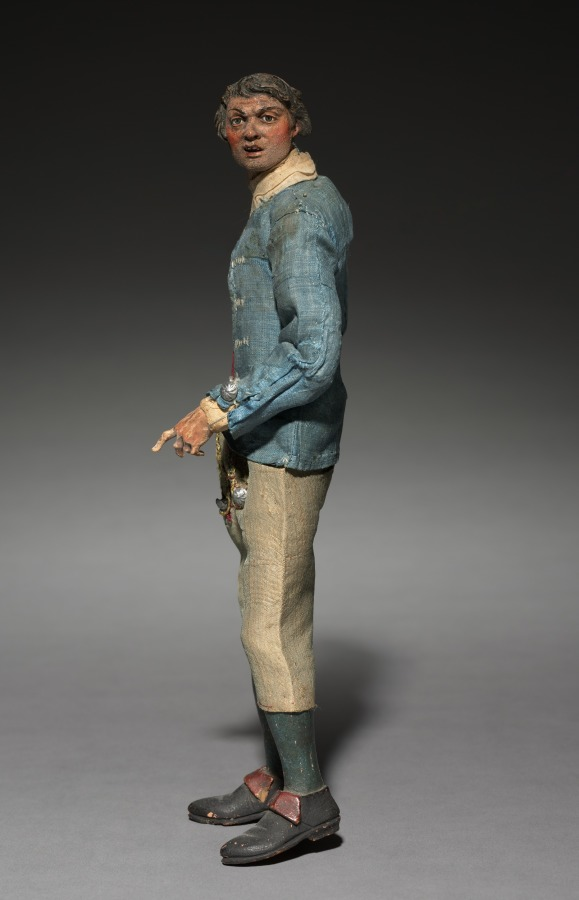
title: Figure from a Crèche: Standing Man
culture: Italy, Naples, late 18th-early 19th century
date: 1780–1830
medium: painted wood and terracotta with various textiles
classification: Sculpture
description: The practice of creating scenes of the Nativity for the home dates from the early 1700s in Italy, where people began to set up doll-like figures of about a foot or less in height. The custom was particularly popular in Naples around 1800, where crèche scenes (crèche means cradle, or crib) included many figures, whose heads and hands of painted terracotta, stuffed cloth bodies, and clothing adapted from contemporary local costumes gave them an amazingly realistic character. Representations of the birth of Jesus can be traced to the first few centuries of Christianity. Both living creatures and sculptural depictions of them were used from early times. By the late middle ages it was customary to create life-size figures of wood or stone, naturalistically painted, to represent the characters who participated in the events of Jesus's early life. These sculptures were then arranged in scenes illustrating one or both of the most important of these events, the Adoration of the Shepherds and the Adoration of the Magi—the three kings from the East who came to pay homage to the Christ child. Used in churches, these large figures were especially popular in Italy, Central Europe, Spain, and Portugal.